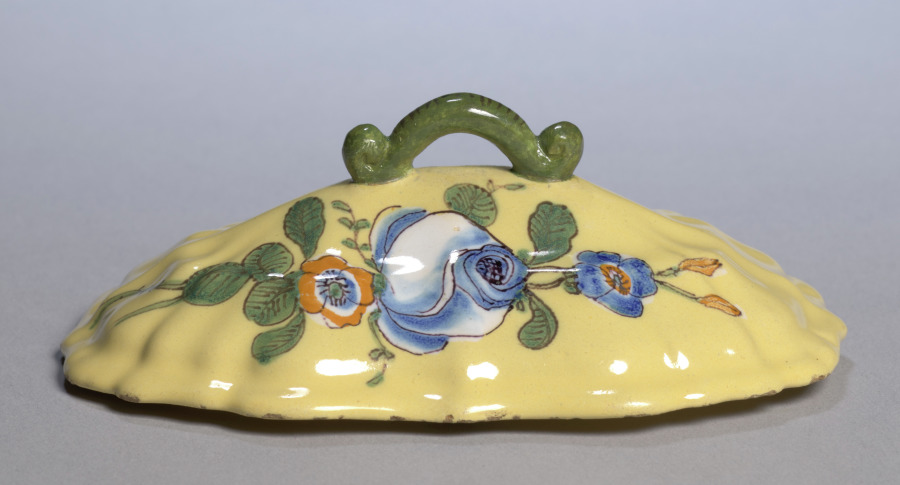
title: Cover for a Spice Bowl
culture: France, Montpellier, 18th century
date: c. 1775–80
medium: faience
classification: Ceramic